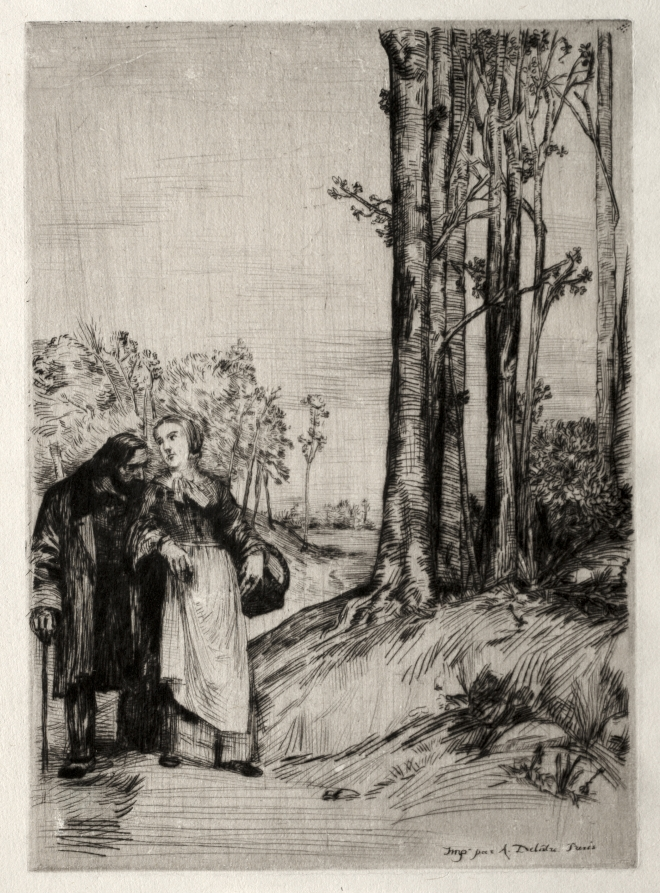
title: Le Promenade du convalescent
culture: France, 19th century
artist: Alphonse Legros (French, 1837–1911)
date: c. 1861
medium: drypoint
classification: Print